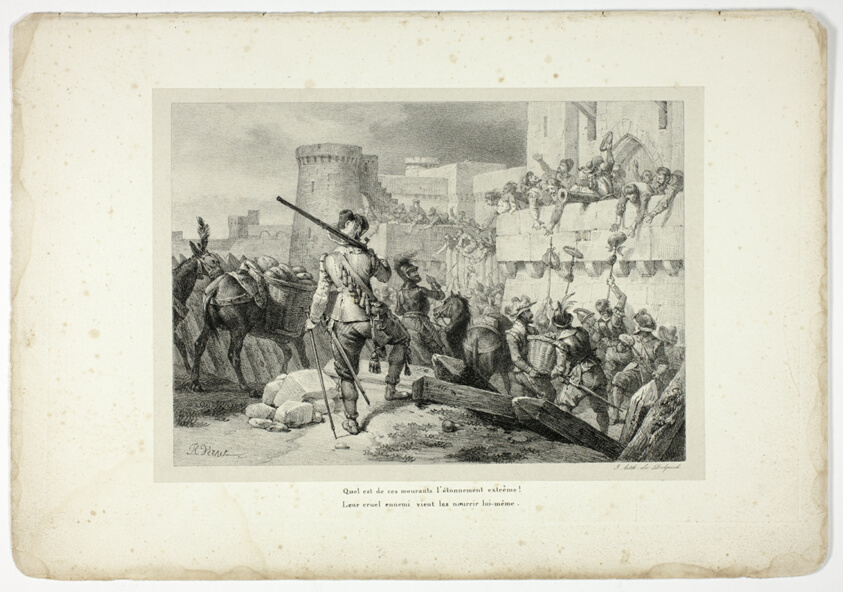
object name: Print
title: Quel est de ces mourants l'étonnement extrême...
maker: Horace Vernet (French, 1789-1863); poem by Voltaire (French, 1694-1778); printed by Francois Seraphin Delpech (French, 1778-1825); published by Dubois (French, 18th-19th century)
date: 1825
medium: Lithograph in black on gray chine, laid down on ivory wove paper (chine collé)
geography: France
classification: lithograph; print; prints and drawing